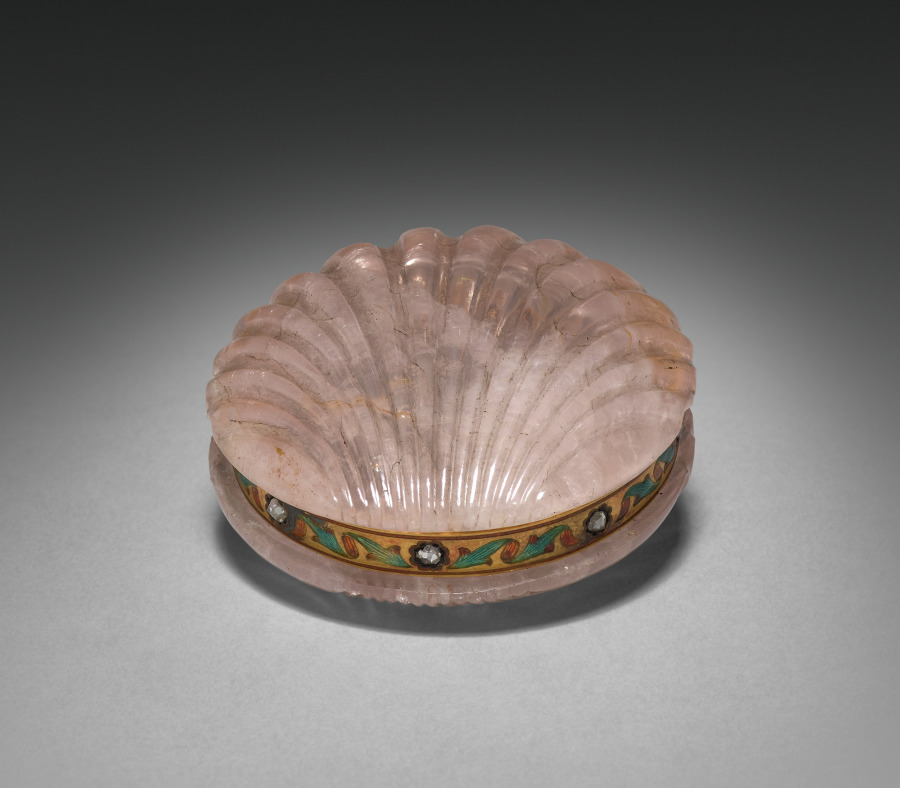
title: Shell-Shaped Box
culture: Italy (?), 19th century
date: late 1800s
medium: pink quartz, gold, enamel, diamonds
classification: Stone